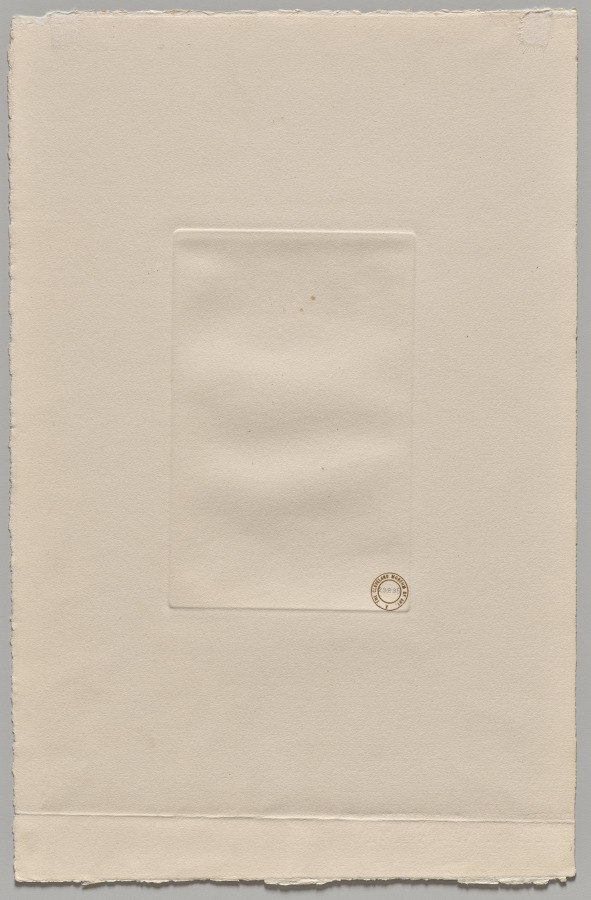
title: At the Circus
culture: Spain, 20th century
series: The Saltimbanques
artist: Pablo Picasso (Spanish, 1881–1973)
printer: Louis Fort (French, active 1800s–1900s)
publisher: Ambroise Vollard (French, 1867–1939)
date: winter 1905–6, printed 1913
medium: drypoint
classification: Print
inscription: Watermark: [VAN GELD]ER ZONEN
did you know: Picasso frequently attended the Cirque Medrano in the Montmartre neighborhood of Paris where he lived at the time.